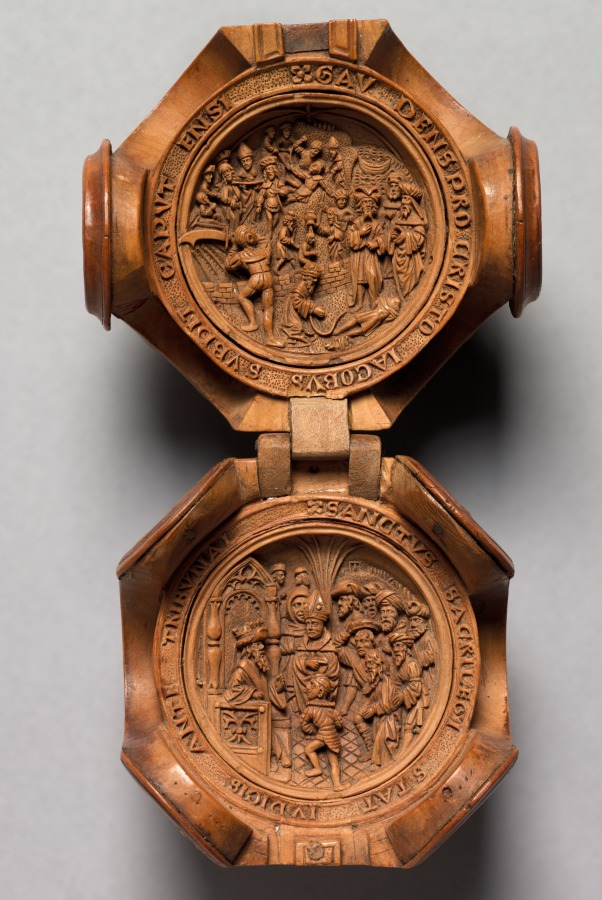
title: Prayer Nut with Scenes from the Life of St. James the Greater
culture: Northern Netherlands (Holland)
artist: Adam Dircksz (Netherlandish, active c. 1500)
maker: and Workshop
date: c. 1500–1530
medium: boxwood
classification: Sculpture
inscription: Interior around lower half: SANCTVS SACRILEGI STAT IVDICIS ANTE TRIBVNAL (Holiness stands before the throne of the profane judge)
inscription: Interior, around upper half: GAVDENS PRO CRISTO IACOBVS SVBDIT CAPVT ENSI (St James submits his head to the sword)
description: Prayer nuts are capsules that can be opened in half and were mainly worn from the end of the 1400s until 1530, particularly in the Netherlands. These objects are generally made from boxwood and carved with extreme refinement and delicacy. They often echo Gothic architecture and include openwork tracery or elaborate decorative patterns. Prayer nuts came into fashion for private devotion as a pendant on the rosary or on a decorative chain. The emergence of prayer nuts went hand in hand with the practice of praying the rosary more frequently at the end of the Middle Ages.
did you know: This miniature masterpiece was held and caressed within the palm of the holder as they prayed and meditated on their faith. What do you use to focus or engage in quiet concentration?